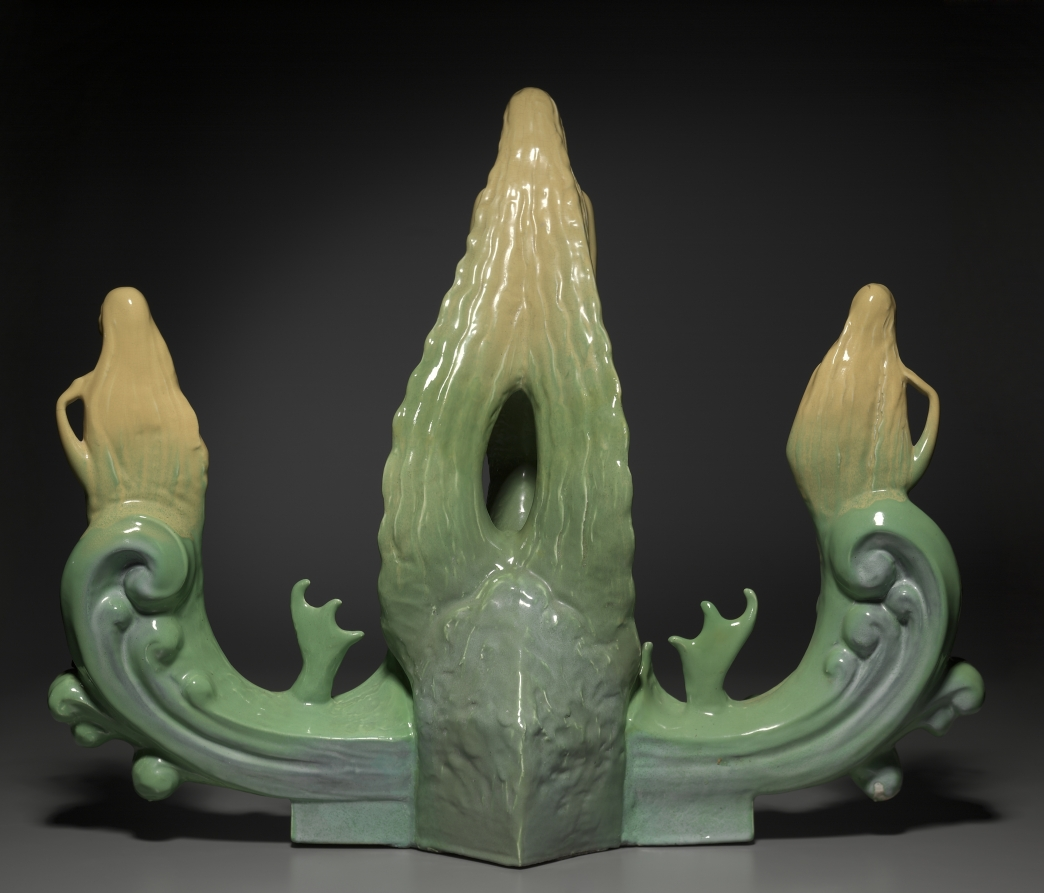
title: Rhine Maidens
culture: America, Ohio, Cleveland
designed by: Waylande Gregory (American, 1905–1971)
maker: Cowan Pottery Studio (America, Rocky River, Ohio, 1920–1931)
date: 1930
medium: glazed earthenware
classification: Ceramic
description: Fresh from study in Europe, Gregory returned to America in 1928 to join the staff at Cowan Pottery Studios, the most prestigious ceramic firm in the Cleveland area at the time. He quickly became their most prolific designer, specializing in sumptuously decorative sculptures of female figures such as Rhine Maidens.